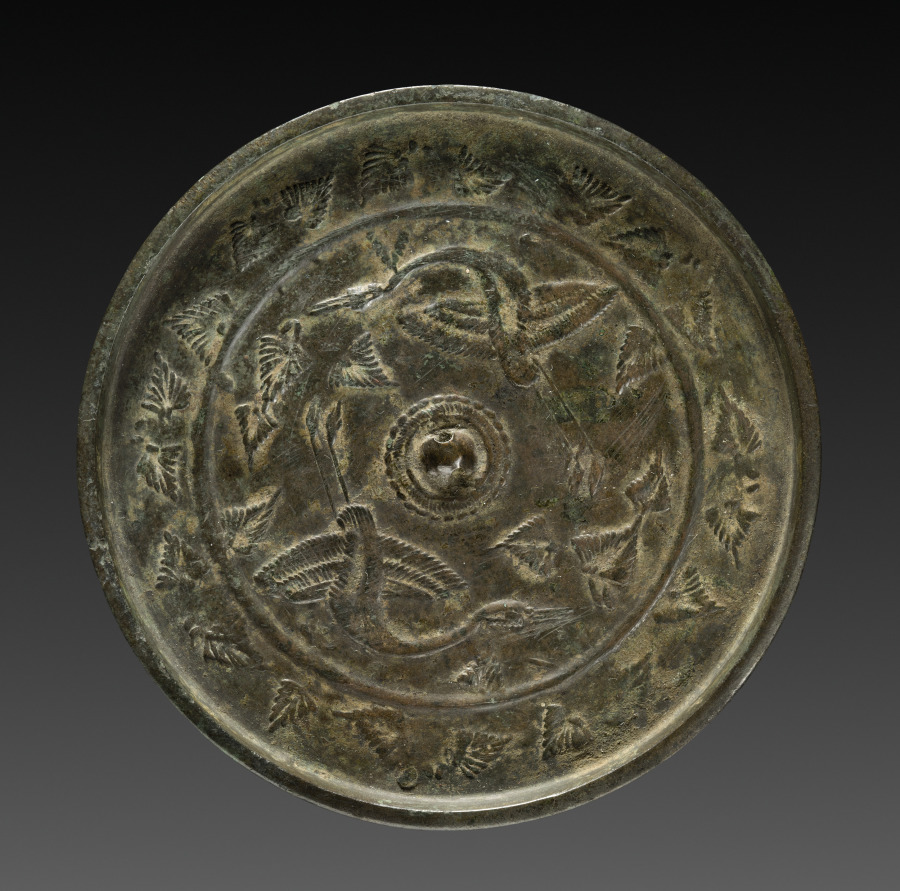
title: Mirror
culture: Japan, Heian period (794–1185)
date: 794–1185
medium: bronze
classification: Metalwork